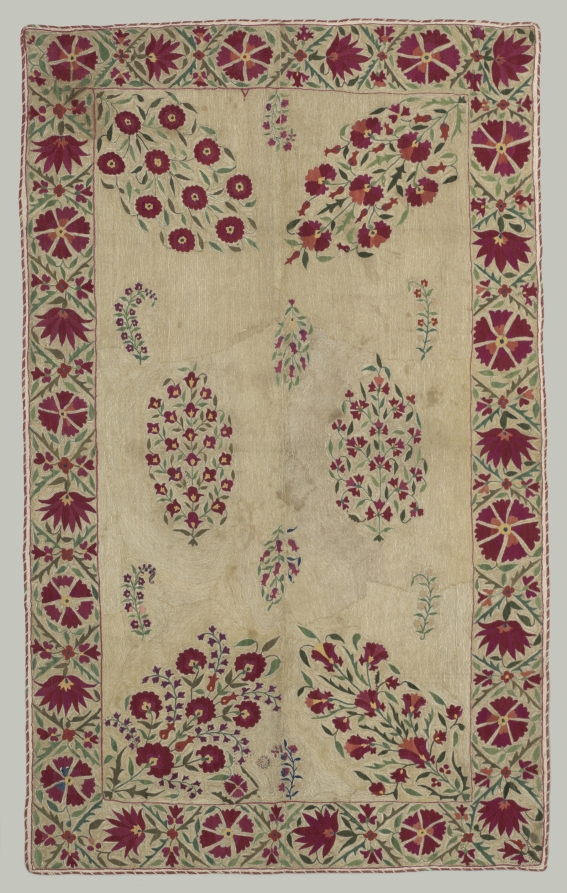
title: Suzani: Divan Cover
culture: Uzbekistan, Bukhara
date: 1700s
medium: Cotton: plain weave; silk: embroidery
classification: Embroidery